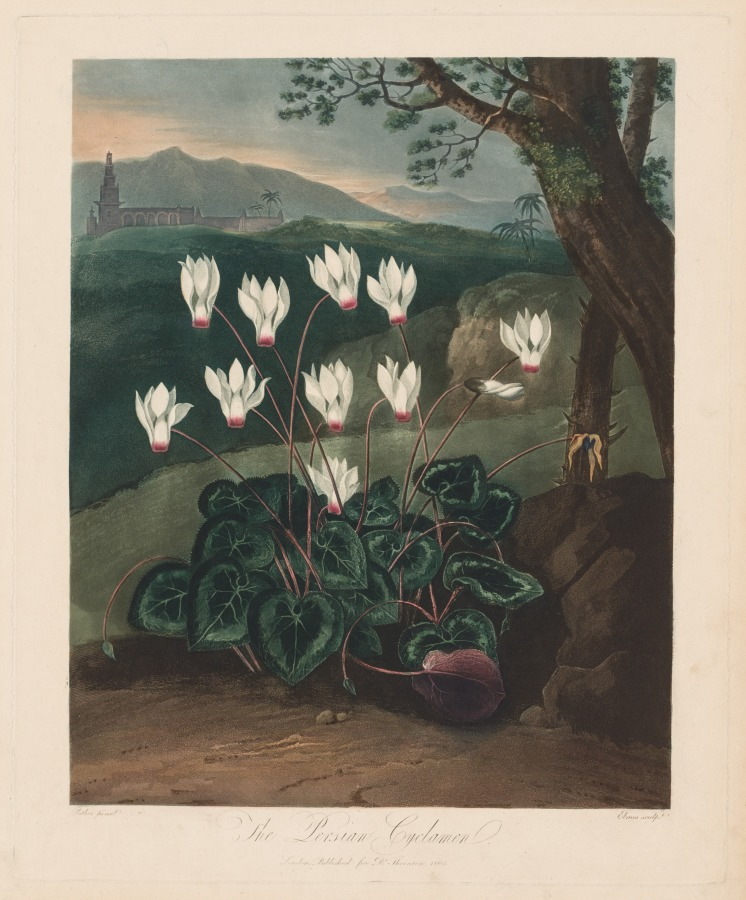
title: The Temple of Flora, or Garden of Nature: The Persian Cyclamen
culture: England, late 18th-early 19th Century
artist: Robert John Thornton (British, 1768–1837)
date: 1799–1807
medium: aquatint, stipple and line engraving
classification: Print